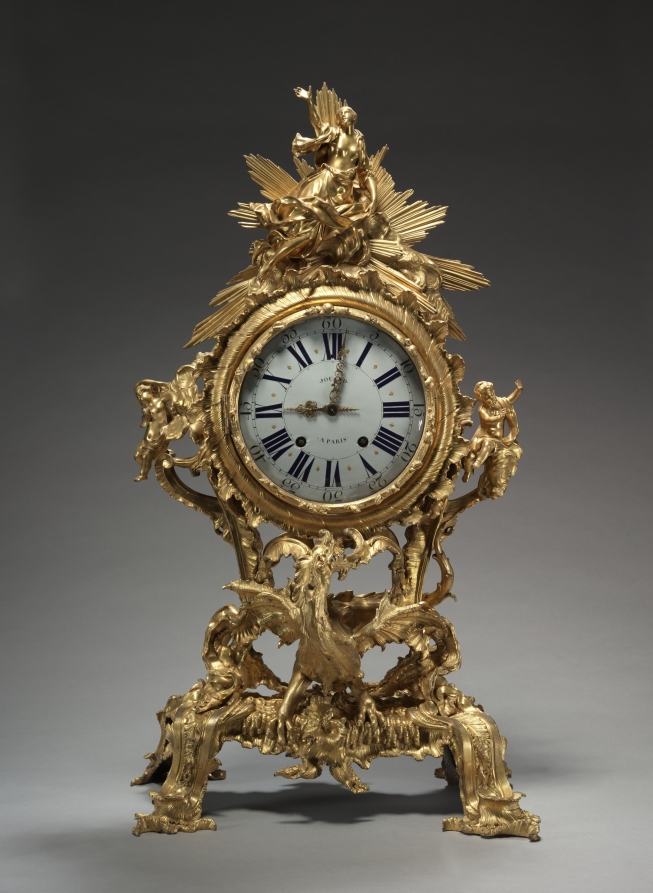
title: Clock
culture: France, 18th century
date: c. 1750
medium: gilt bronze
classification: Furniture and woodwork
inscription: on clock face: JOUARD A PARIS; engraved on plaque attached to back of clock face: Jouard Paris.